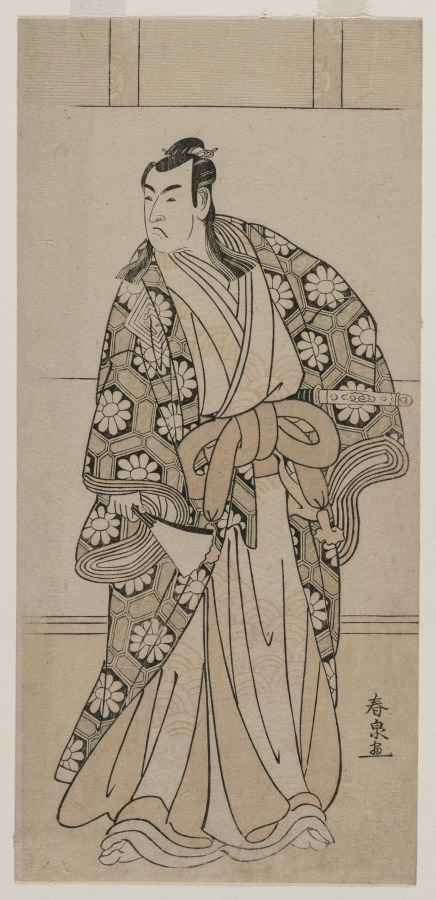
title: Ichikawa Monnosuke II as a Lord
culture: Japan, Edo period (1615–1868)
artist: Katsukawa Shunkō II (Shunsen) (Japanese, c. 1762-c. 1821)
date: 1780s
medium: color woodblock print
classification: Print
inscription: Signature: Shunsen ga